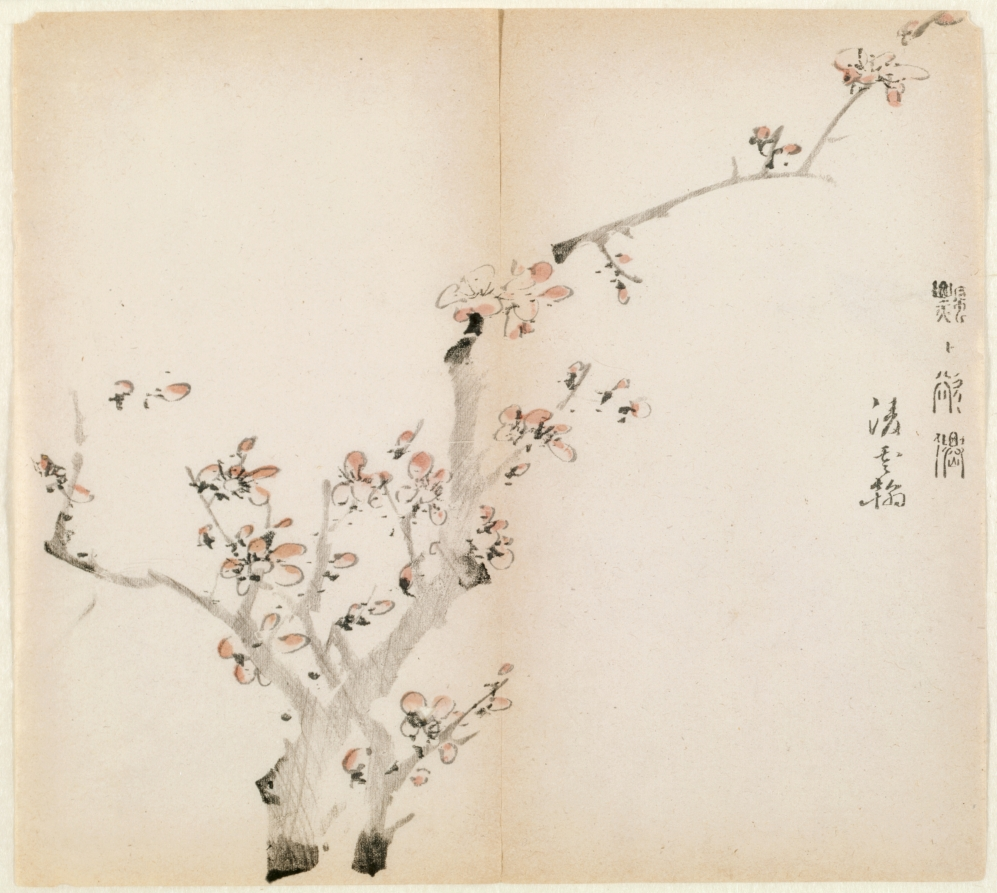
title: Peach Blossoms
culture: China, Qing dynasty (1644-1911)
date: 18th Century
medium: color woodblock print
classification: Print